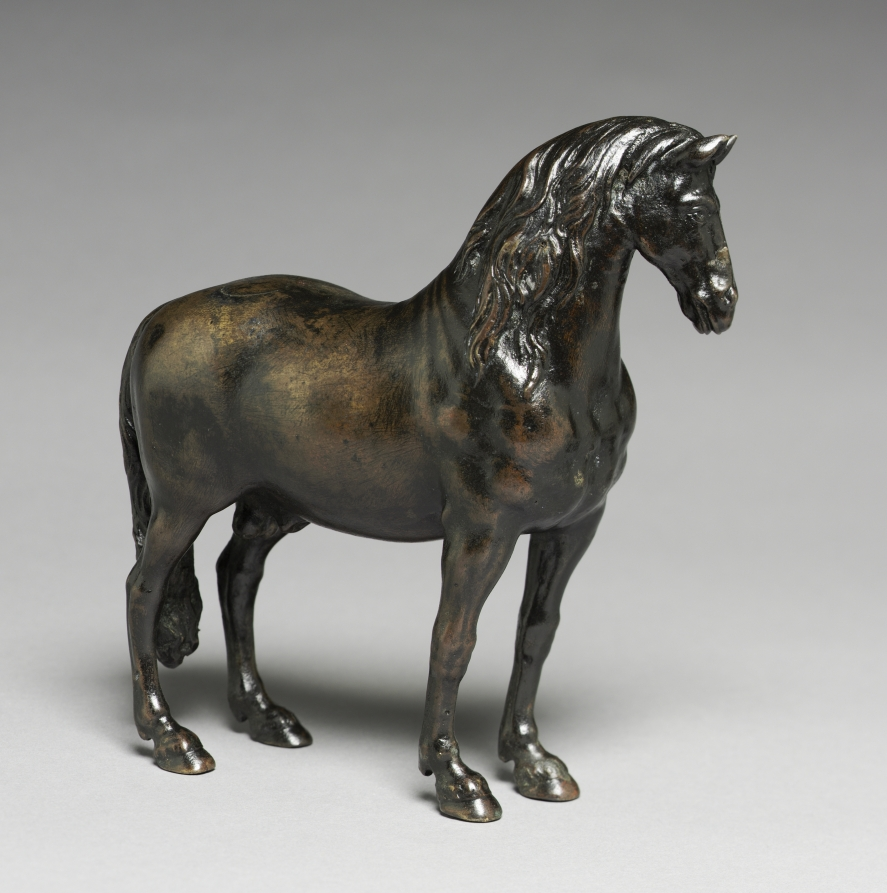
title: Horse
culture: Germany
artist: possibly cast after a model by Francesco Fanelli (Italian, 1661)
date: 1630s or later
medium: bronze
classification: Sculpture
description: Shortly after its acquisition, this work was published as a model for an equestrian monument of Emperor Maximilian by Gregor Erhart, cast by one of Maximilian's bronze founders in Augsburg. Recent scholars have questioned the connection to Erhart and have placed it closer to Fanelli, due to the rendering of the horse's head and the waxy overall feel of the modeling. Related works in Braunschweig and (formerly) Berlin already carry attributions to a Fanelli model.